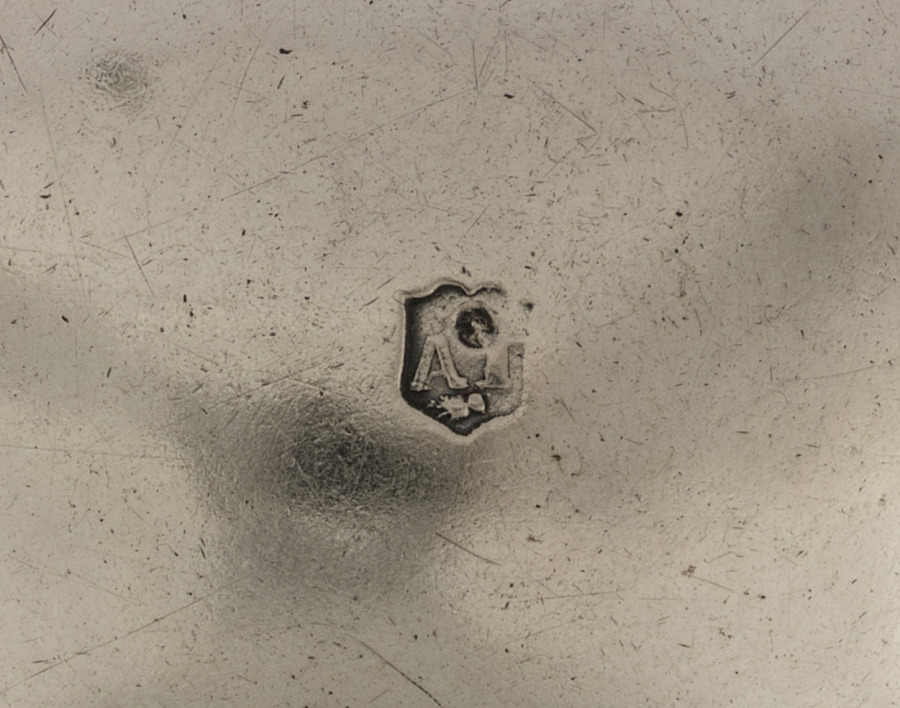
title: Porringer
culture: America, Massachusetts, Boston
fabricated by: Andrew Tyler (American, 1692–1741)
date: c. 1725–30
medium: silver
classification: Silver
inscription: engraved "MC" in block letters on top of handle (facing away from bowl). Scratched underneath handle: "8..12."